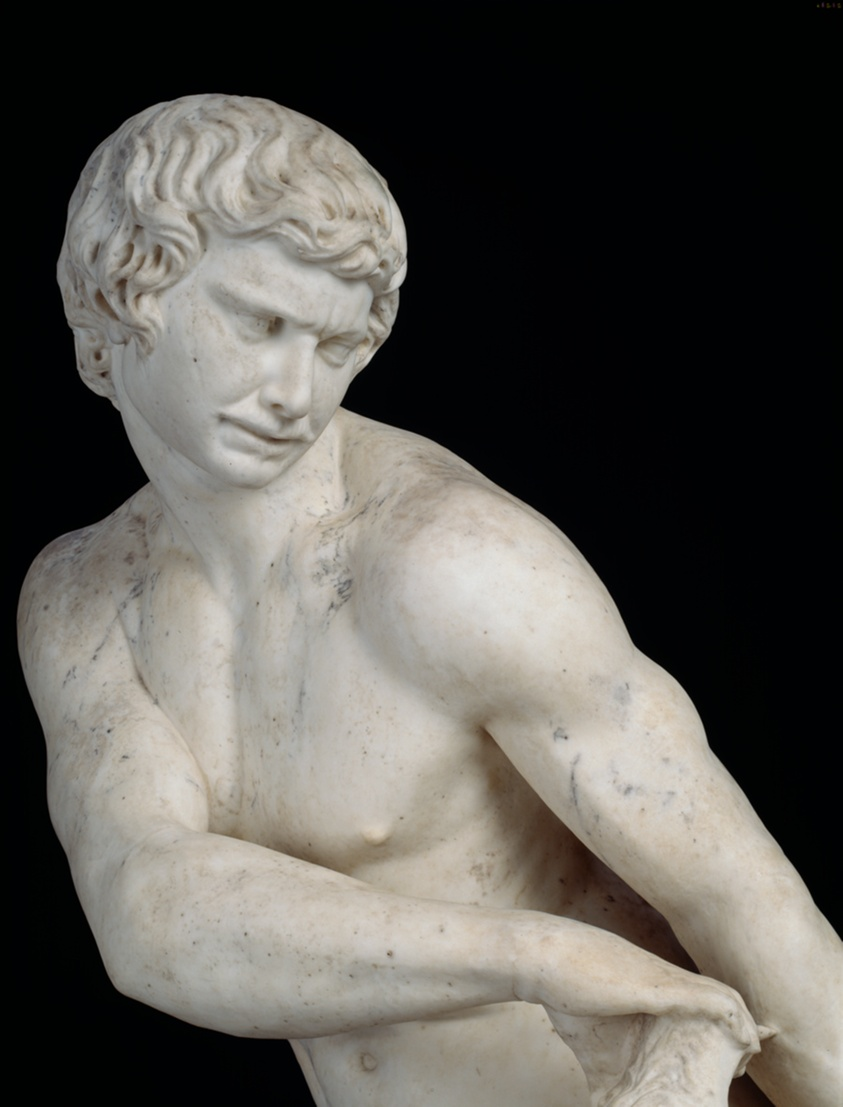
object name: Sculpture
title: Samson and the Lion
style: 17th Century, Baroque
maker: Cristoforo Stati (Italian, 1556–1619)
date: 1604–7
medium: Marble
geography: Italy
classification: large scale; sculpture; Italian; marble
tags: religious, Old Testament, religious scenes, nudes, man, figure, biblical, animals, lions, religious figures